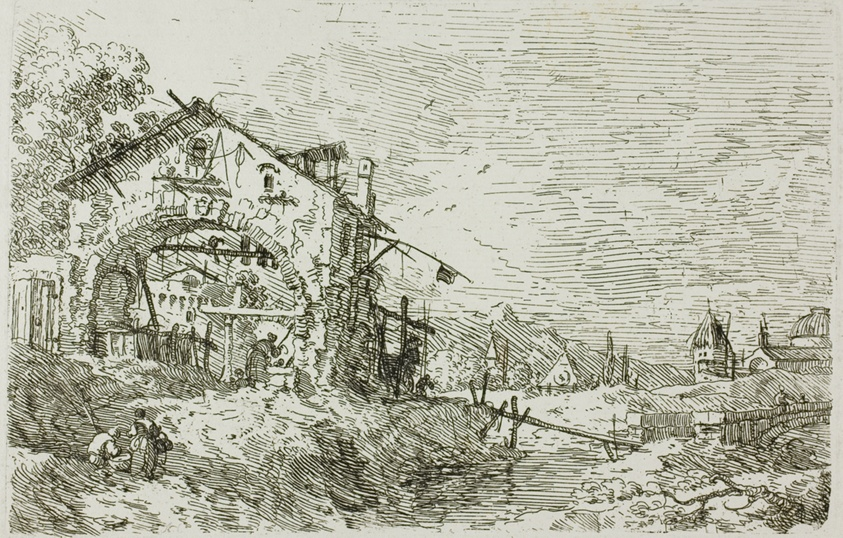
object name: Print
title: Landscape with a Woman at a Well, from Vedute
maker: Canaletto (Italian, 1697-1768)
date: 1735/44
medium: Etching in black on ivory laid paper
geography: Italy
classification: etching; print; prints and drawing